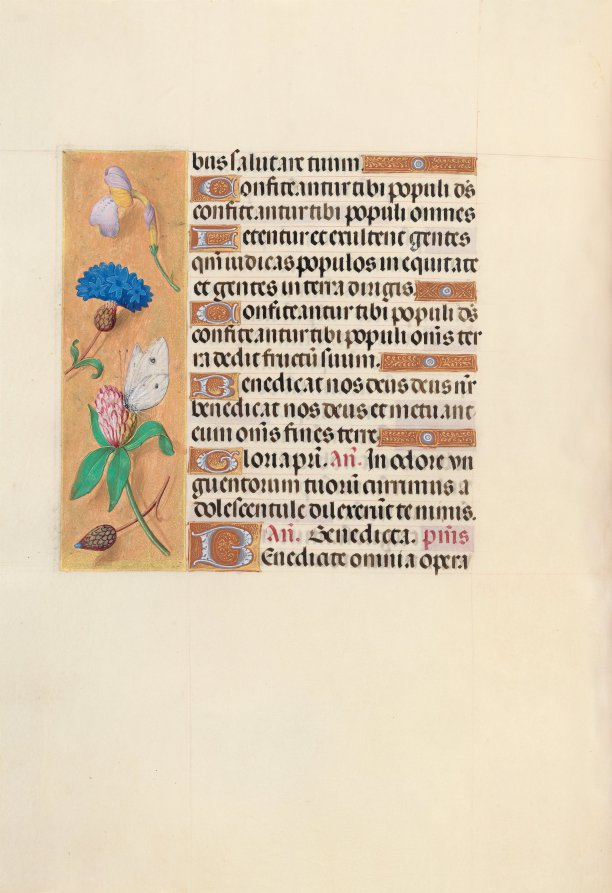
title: Hours of Queen Isabella the Catholic, Queen of Spain: Fol. 118v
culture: Flanders, Ghent and Bruges, late 15th century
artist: Master of the First Prayerbook of Maximillian (Flemish, c. 1444–1519)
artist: and Associates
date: c. 1500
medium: ink, tempera, and gold on vellum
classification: Bound Volume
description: This manuscript was illuminated by a circle of at least five highly organized manuscript painters active in the Flemish cities of Ghent and Bruges. The principal illuminator was Alexander Bening, who painted the majority of the book's miniatures. Manuscripts produced by this circle of artists are renowned for the decoration of their borders, which typically feature a rich variety of realistically-painted flowers, birds, and butterflies. This prayer book, called a book of hours, was intended not for a cleric, but for the private devotions of a lay person-in this case, Isabella the Catholic, Queen of Spain (1451-1504). Isabella's coat of arms embellishes the book's frontispiece. It is unlikely that the book was commissioned by the Queen herself; rather, she probably received it as a diplomatic gift from someone courting her patronage, perhaps Cardinal Francisco Jimenez de Cisneros. A Franciscan friar, Jimenez was dependent upon Isabella for his advancement, first to the post of Queen's confessor in 1492, and then to Archbishop of Toledo in 1495.